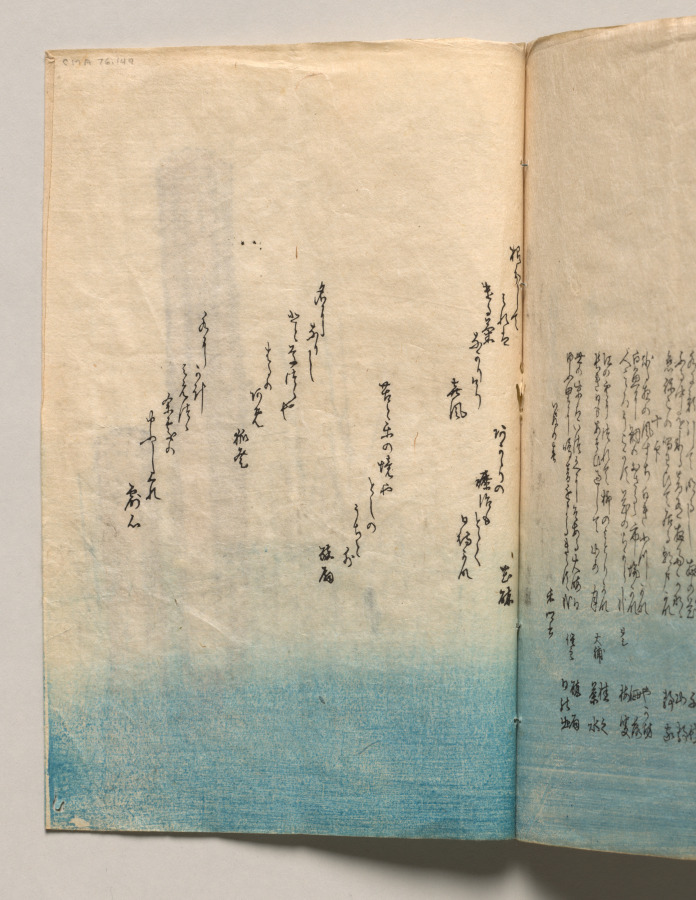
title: Spread Four from Verses for Winter and Spring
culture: Japan, Edo period (1615–1868)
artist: Utagawa Hiroshige (Japanese, 1797–1858)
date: 1850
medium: Woodblock printed book; ink and color on paper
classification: Bound Volume